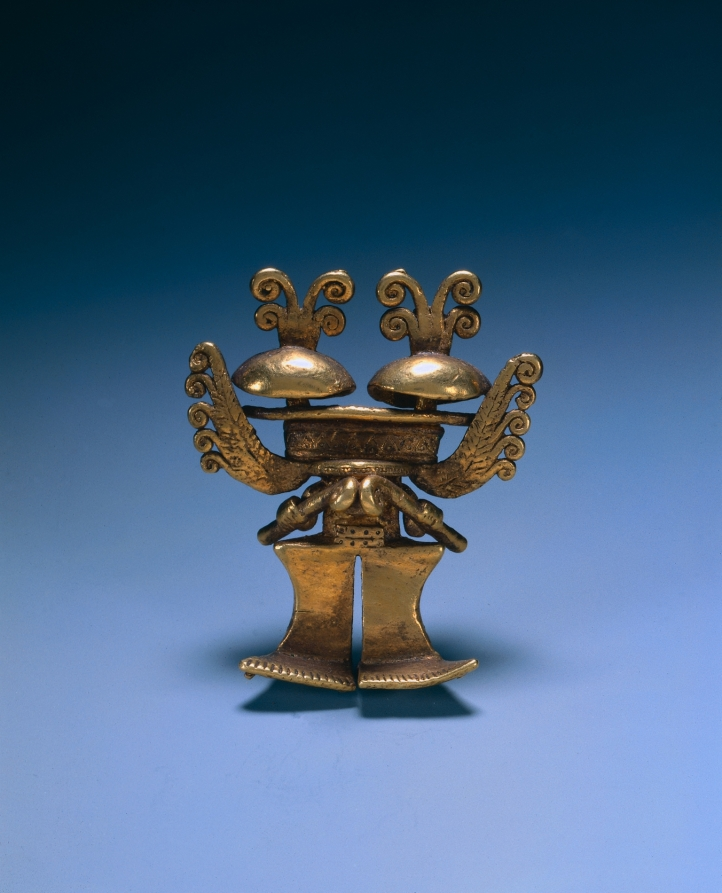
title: Animal-Headed Figure Pendant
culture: Colombia, Quimbaya or Yotoco style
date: 1–800 CE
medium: cast gold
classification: Metalwork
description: The same creature, nasty but precious, appears in both pendants (1939.515). Human in its posture and arms, its head is that of an animal with a long, toothy snout. It holds batons to its mouth, and whiskers or ears flare from the sides of the head. The little headdress domes are mystifying; they have been described as mushrooms, gourds, and ceramic vessels, among other things.